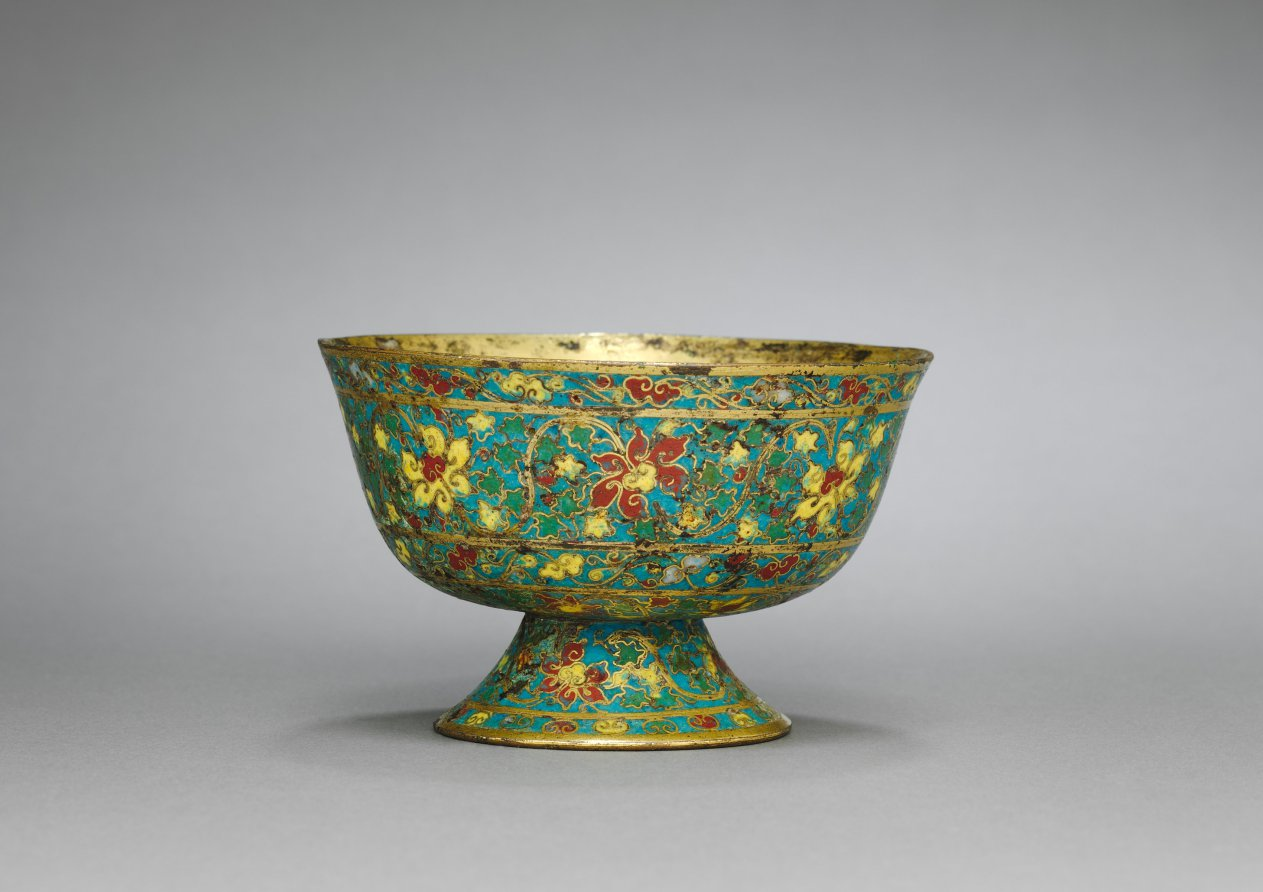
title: Bowl with Splayed Foot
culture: China, Qing dynasty (1644-1911)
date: 1700s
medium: cloisonné enamel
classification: Enamel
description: In cloisonné enameling, the decorative patterns are outlined by soldering metal wires (usually copper) to a metal base, creating a network of cells, or cloisons, to be filled with powdered enamels. After firing, the enamels are polished to create a smooth surface level with the cloisons. The exposed metal surfaces are gilt.